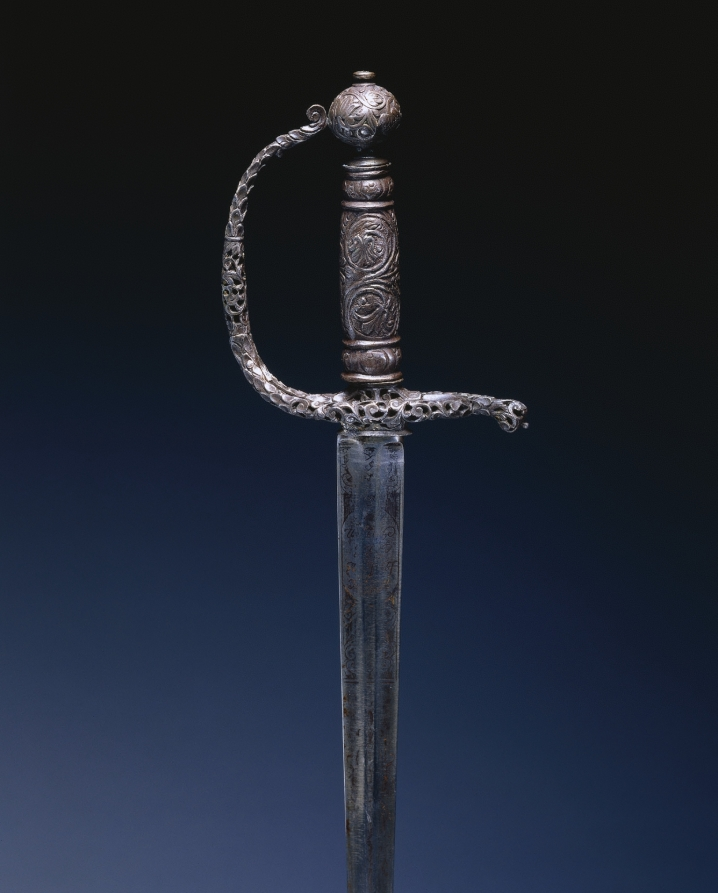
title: Small Sword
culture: England, 17th century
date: c. 1650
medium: steel, pierced, chiseled, and engraved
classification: Arms and Armor